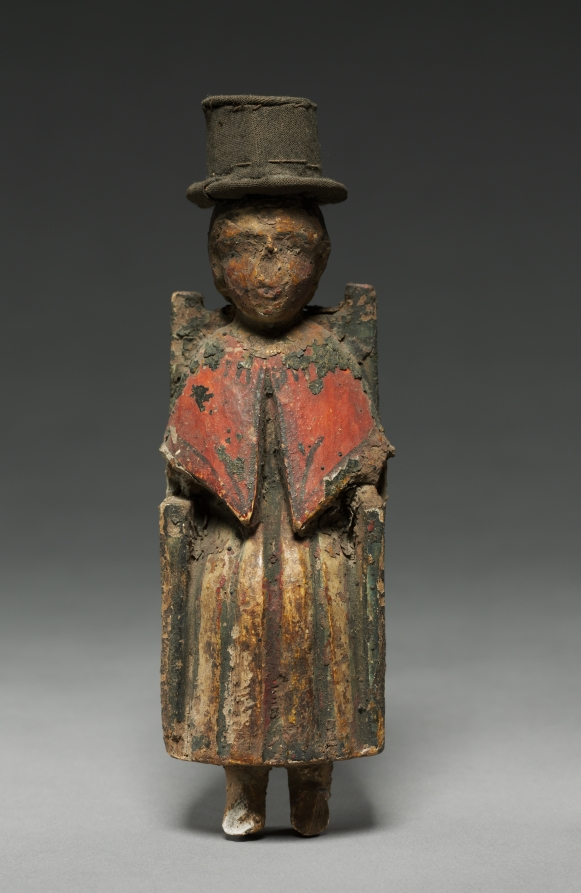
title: Christ Child: santo de bulto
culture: America, New Mexico, 17th-18th century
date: 1600s-1700s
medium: wood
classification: Sculpture